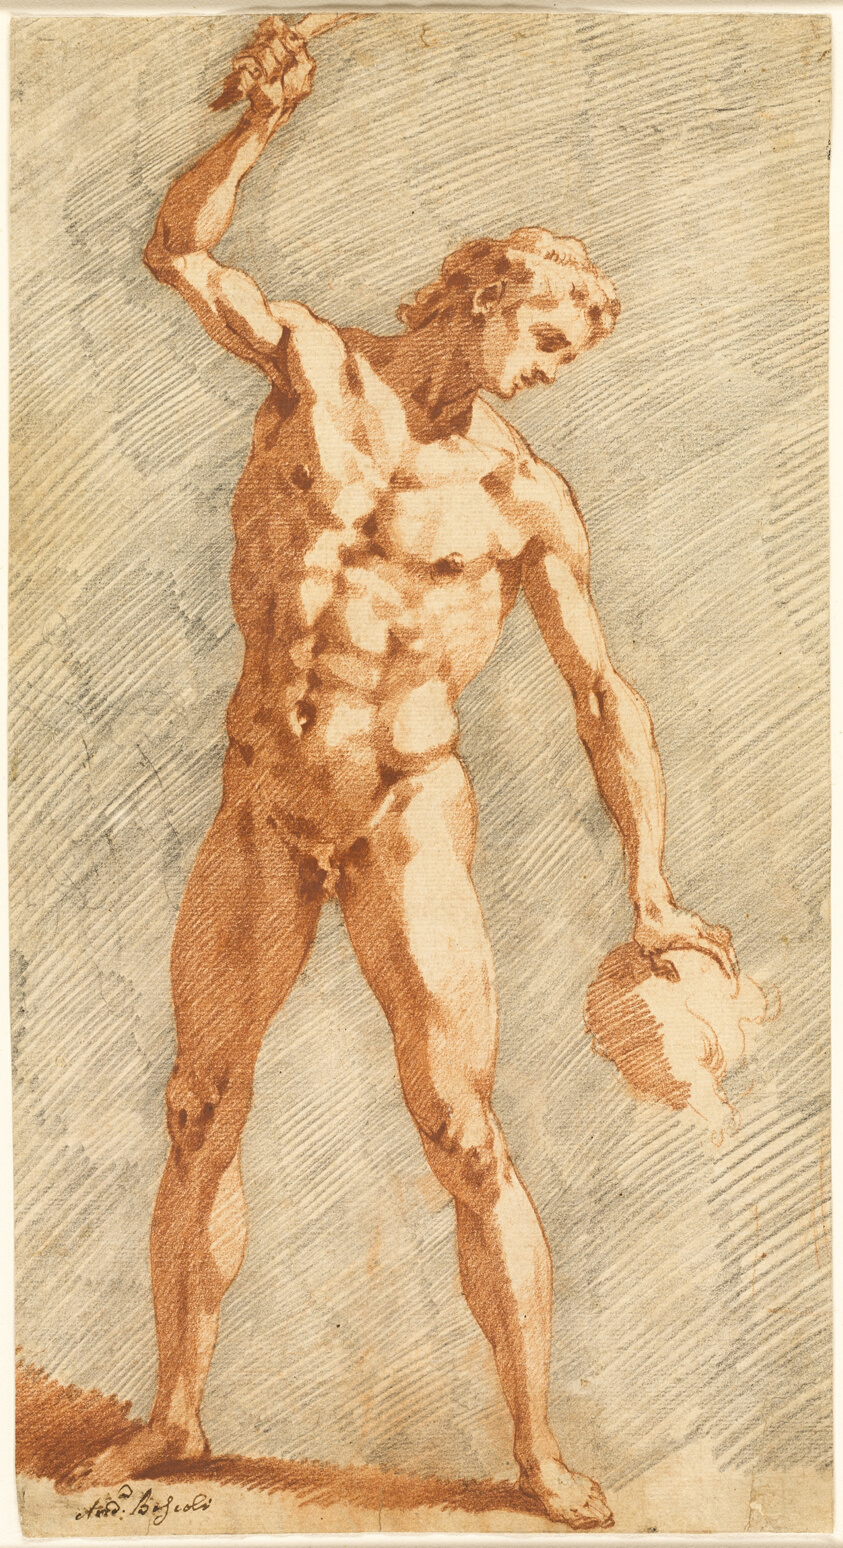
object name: Drawing and Watercolor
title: Standing Academy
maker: Andrea Boscoli (Italian, c. 1560-1608)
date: c. 1587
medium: Red and black chalk, on buff laid paper, laid down on cream laid paper, tipped onto cream board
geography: Italy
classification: chalk; drawings (visual works); prints and drawing